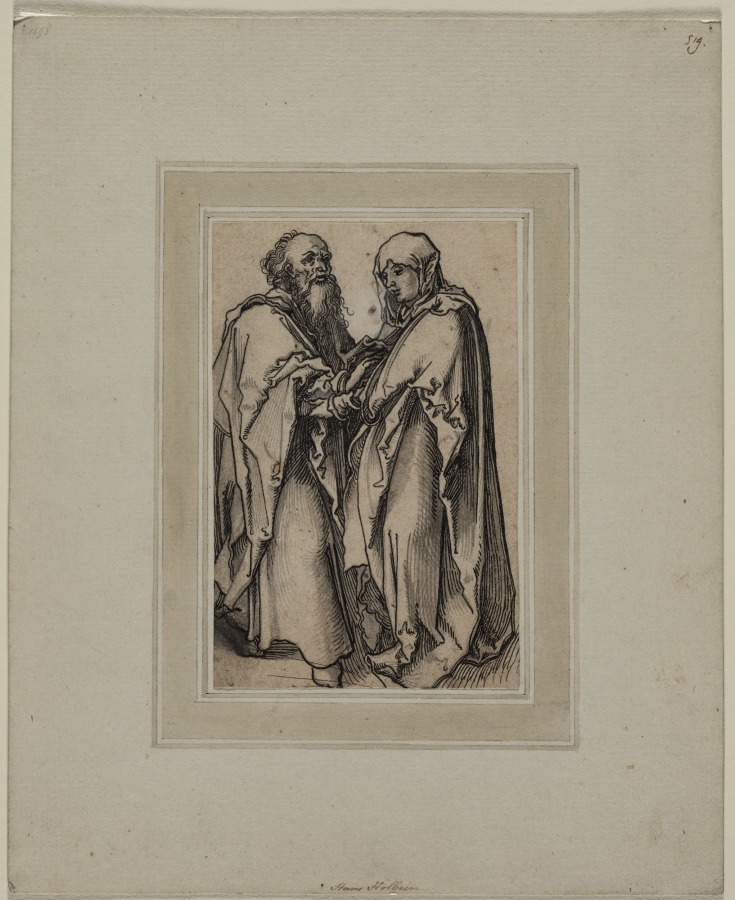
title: The Meeting of Joachim and Anna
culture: Germany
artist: Wolf Traut (German, c. 1486–1520)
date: first quarter 1500s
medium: pen and black ink and brush and gray wash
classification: Drawing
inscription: SECONDARY SUPPORT, upper left, in graphite: 1498 ; upper right, in brown ink: sig. ; lower center, in brown ink: Hans Holbein ; VERSO OF SECONDARY SUPPORT, lower left, in brown ink: Fagel's colln 1801 P 47[47 crossed out] ; upper left, in red chalk: 32 - ; lower center, in graphite: Wolf Traut d 1520 / Nuremberg / cf Holy c[illegible] at Budapest ; lower right, in graphite: (Popham) [parentheses part of inscription] ; lower left, in graphite: woodburn / (mount) [parentheses part of inscription] ; lower right, in graphite: W. Esdaile coll ; lower right, in graphite: T/2